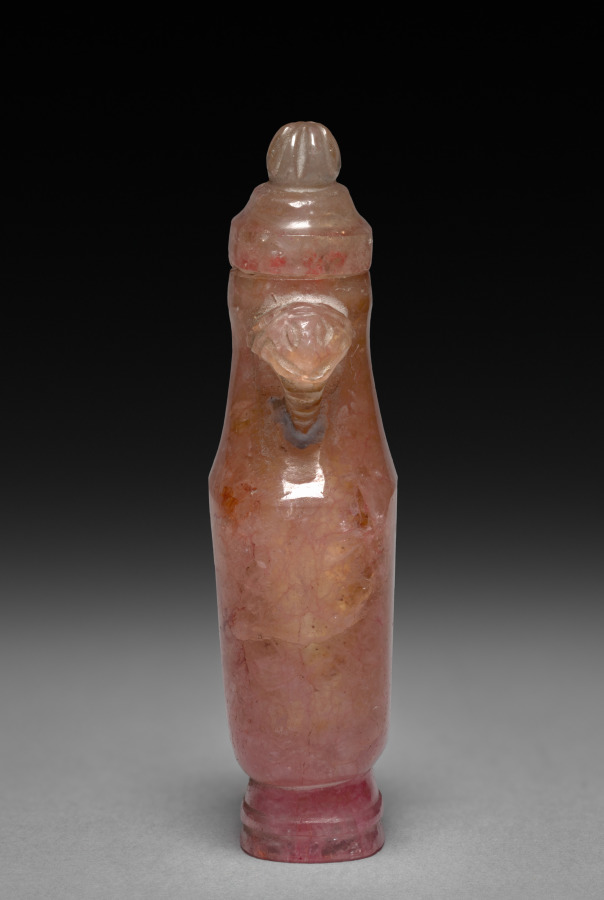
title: Miniature Jar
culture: China, Qing dynasty (1644-1911)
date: 19th-early 20th century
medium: jade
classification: Jade